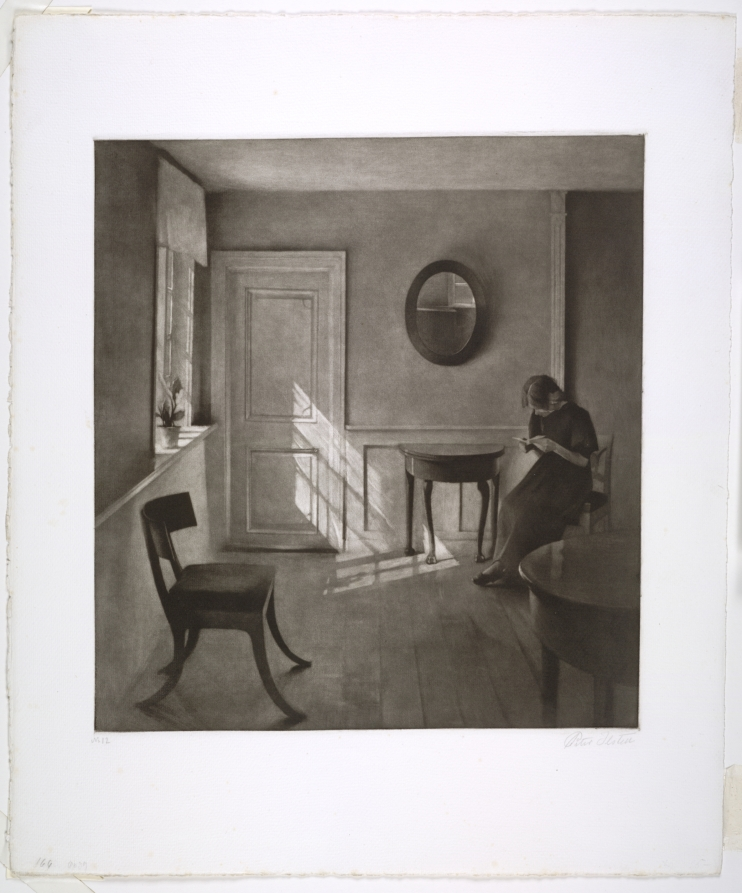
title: Sunshine in an Interior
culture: Denmark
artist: Peter Vilhelm Ilsted (Danish, 1861–1933)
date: 1920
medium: mezzotint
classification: Print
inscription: signed and numbered, in graphite, below platemark: No. 12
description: Peter Vilhelm Ilsted was one of only a few artists of his time to take up mezzotint, the printmaking technique used here. The process involved a tonal reversal—with the artist working from dark to light—that allowed Ilsted to render evocative and moody interiors. Like this print, most of his works were inhabited by young women seen from behind or in profile and involved in introspection or study. The subject of this work appears in darkness at the far side of the image, just beyond a patch of dramatic sunlight that enters the space and perhaps suggests her distance from the outside world.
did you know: Peter Vilhelm Ilsted and his brother-in-law, the painter Vilhelm Hammershøi, pioneered a style of Danish art that was characterized by quiet interior scenes in muted colors.